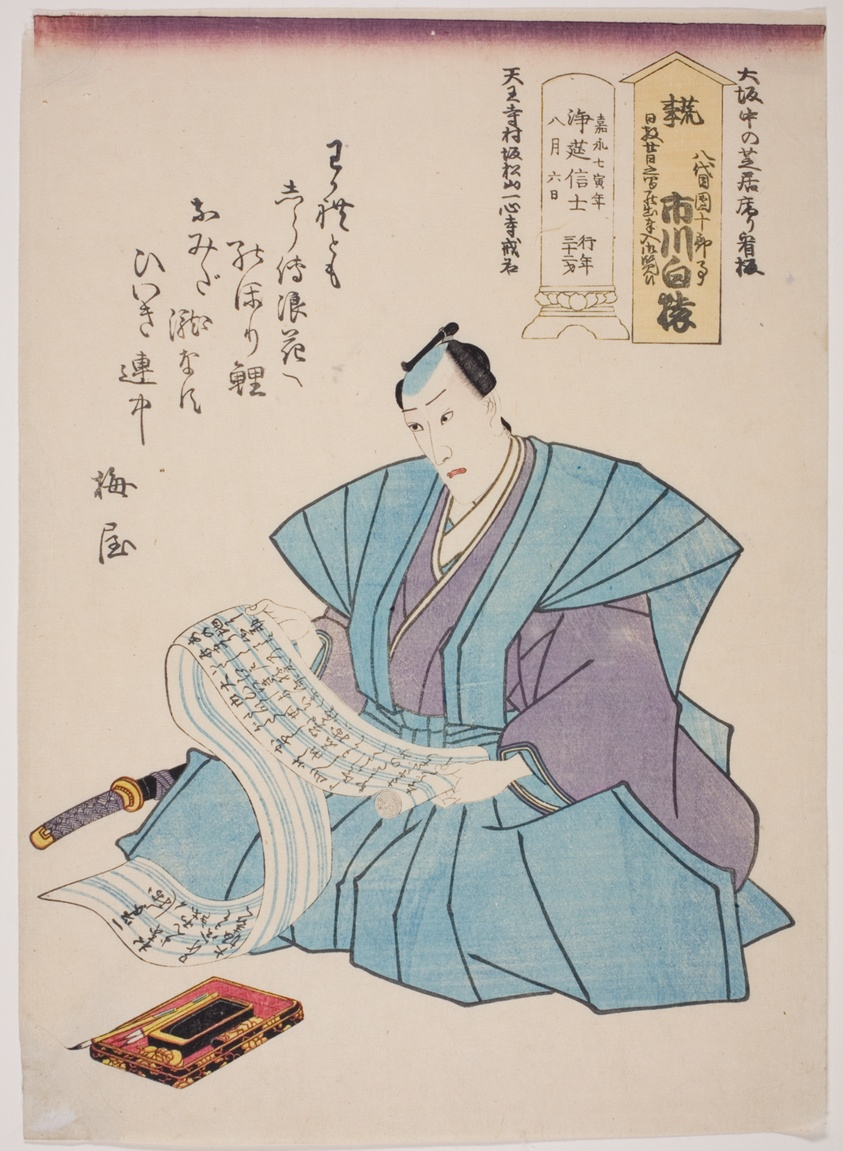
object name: Print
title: Memorial Portrait of the Actor Ichikawa Hakuen (Danjuro VIII)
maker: Utagawa School (Japanese, 19th century)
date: 1854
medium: Color woodblock print; oban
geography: Japan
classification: print; asian art